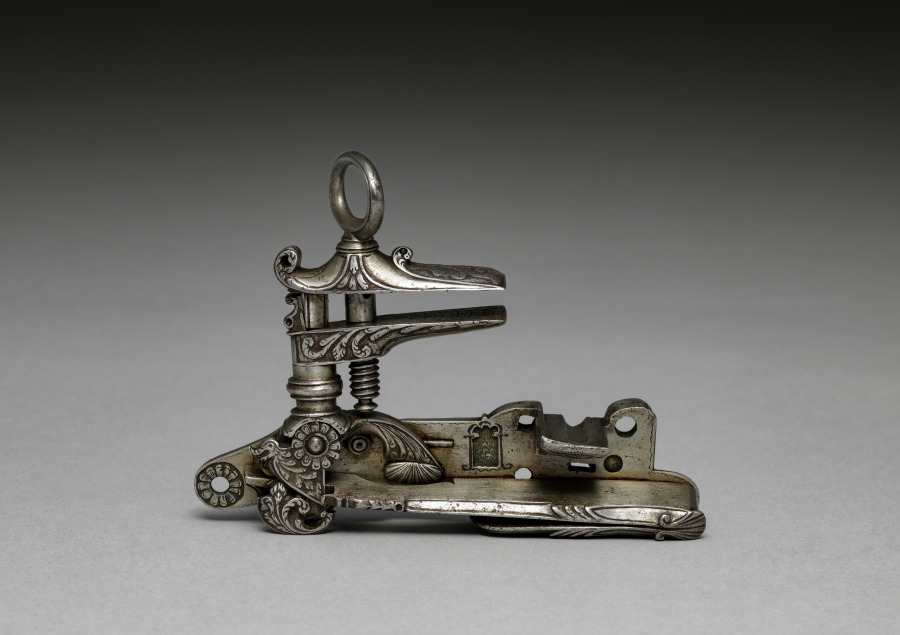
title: Snaphance Gunlock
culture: Spain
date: 1700s or early 1800s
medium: steel, engraved and chased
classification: Arms and Armor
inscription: signed: TANINE and L. ANDYOLOZ